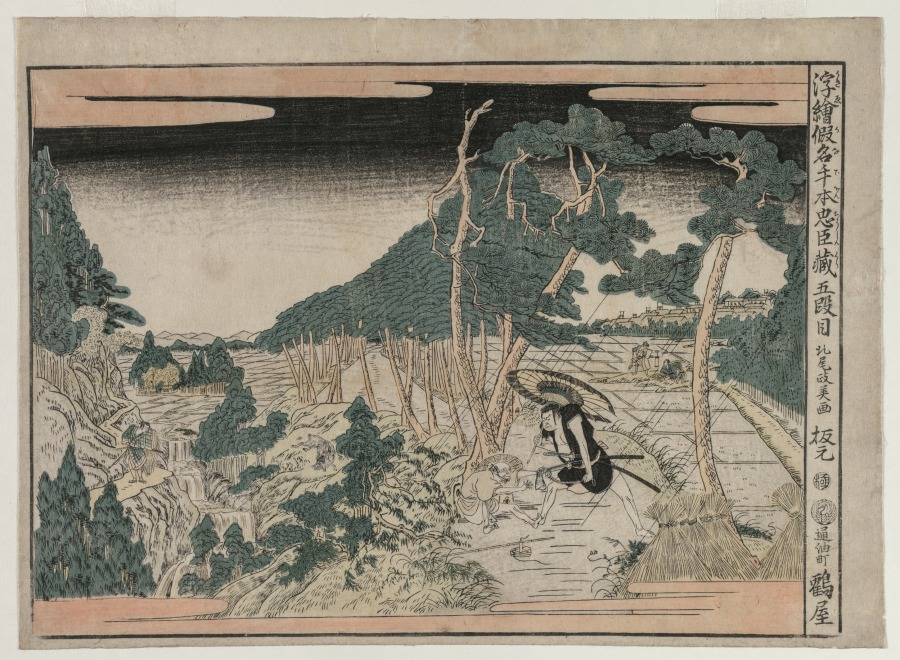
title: Chushingura: Act V (from the series Perspective Pictures for The Treasure House of Loyalty)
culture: Japan, Edo period (1615–1868)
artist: Kitao Masayoshi (Japanese, 1761–1824)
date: c. 1790s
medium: color woodblock print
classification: Print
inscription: Signature: Kitao Masayoshi ga Publisher: Tsuruya Kiemon (hammoto Toriaburacho Tsuruya, emblem) Censorship Seal: kiwame